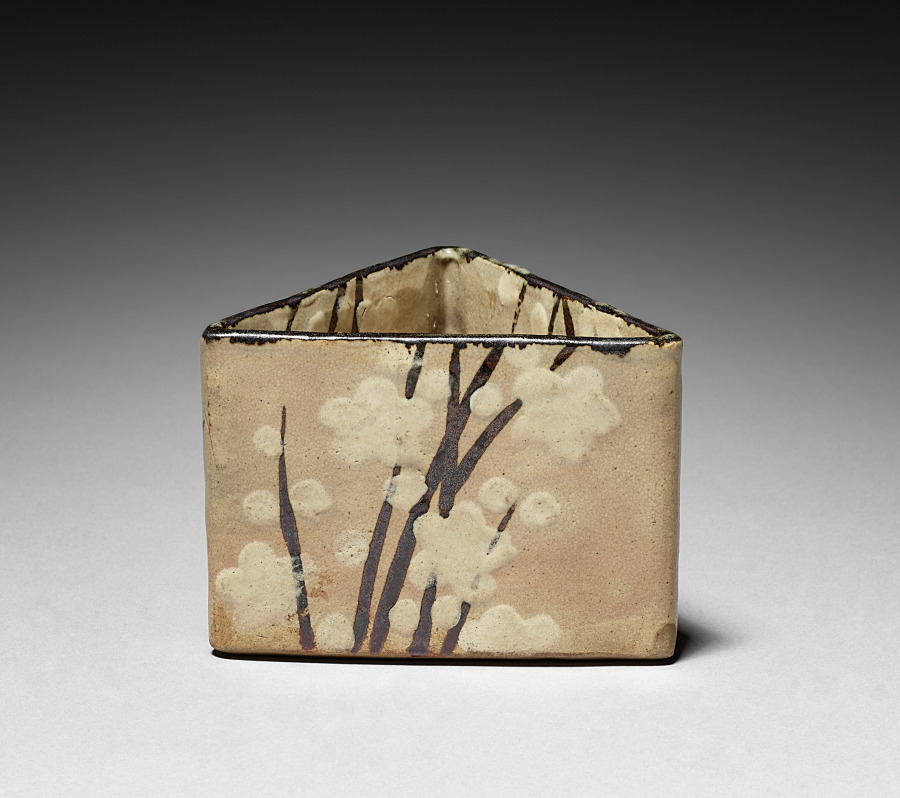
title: One of Five Serving Bowls (Mukozuke) with Prunus Design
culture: Japan, Edo period (1615–1868)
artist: school of Ogata Kenzan (Japanese, 1663–1743)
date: 1700s to mid-1800s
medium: Kyoto Ware: stoneware with underglaze iron oxide and slip decoration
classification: Ceramic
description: Note the rough, tan, clay bodies of these bowls with their deliberate irregularities. The design of branches was first painted in a black iron oxide, then the blossoms and buds in a white slip, followed by the application of a very thin transparent overglaze.